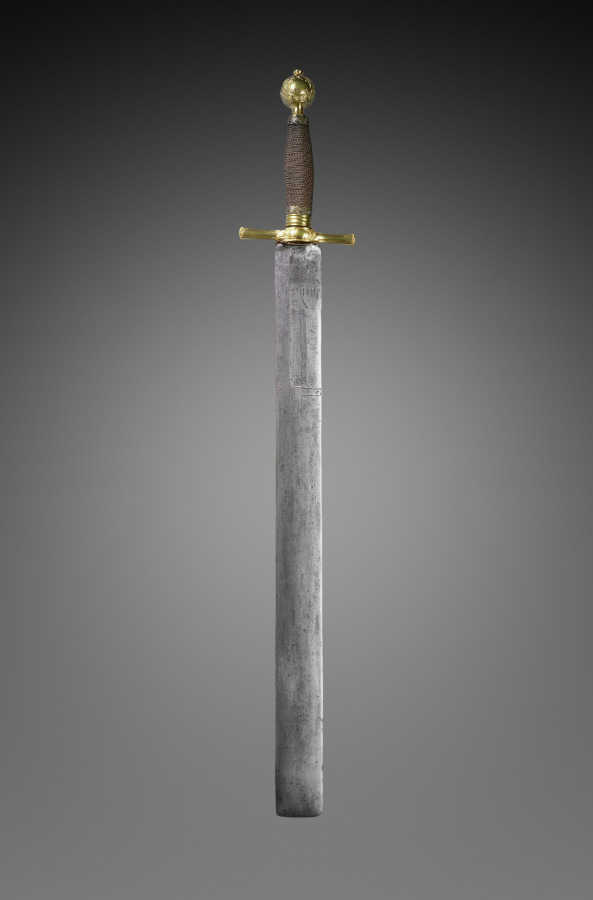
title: Executioner's Sword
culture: Germany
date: blade dated 1634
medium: steel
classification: Arms and Armor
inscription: VIAT JUSTICIDET VERBUM CARO FACTUM, 1634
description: An executioner's sword is specifically designed and balanced for decapitation, not combat. It usually features short quillons or cross guards, as the hands did not need added protection, and a blunt end. In wide use during the 1600s, by the 1700s they were largely out of use except for ceremonial purposes.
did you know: The blades of executioner's swords were often decorated with moralistic inscriptions.